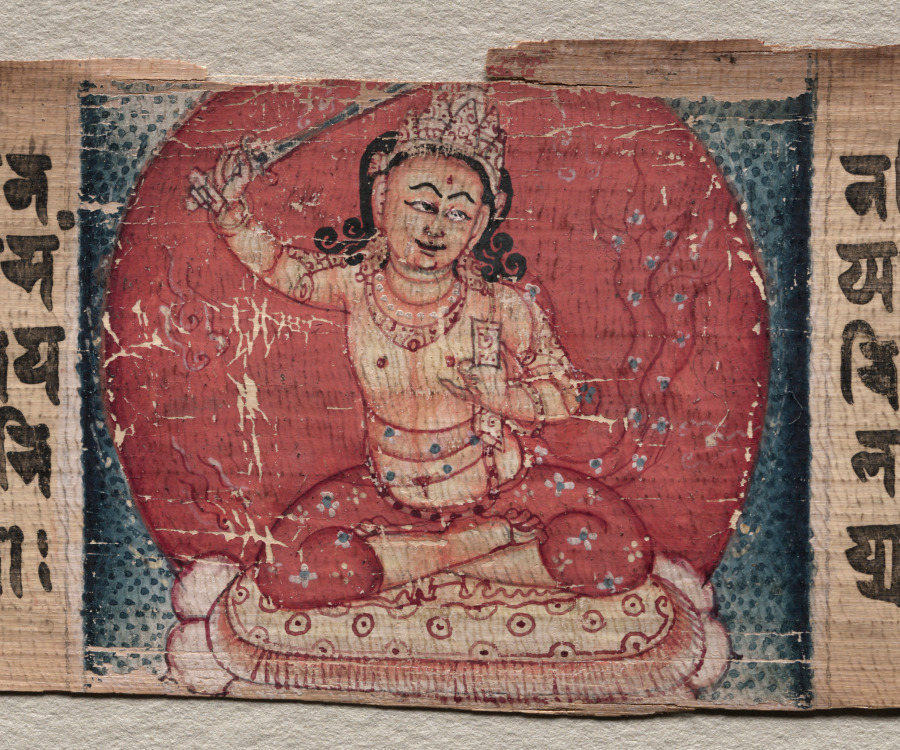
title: Bodhisattva Samantabhadra purifies the path to enlightenment, with Manjushri, folio 348 (verso) from a Gandavyuha-sutra (Scripture of the Supreme Array)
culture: Nepal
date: 1000–1100s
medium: gum tempera and ink on palm leaf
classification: Painting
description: The painting in the center shows a righteous bodhisattva tossing aside a blue-skinned heretic, while an impious blue-clad monk sits behind them, the next to be overpowered by the righteous one. In the painting on the left, the Bodhisattva of Wisdom, Manjushri, brandishes his sword, and at the far right, a Buddhist priest (Vajracharya) sets fire to a Hindu sage in a rocky landscape.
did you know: Blue-clad monks were said to visit prostitutes, drink liquor, and practice extreme tantric rituals.